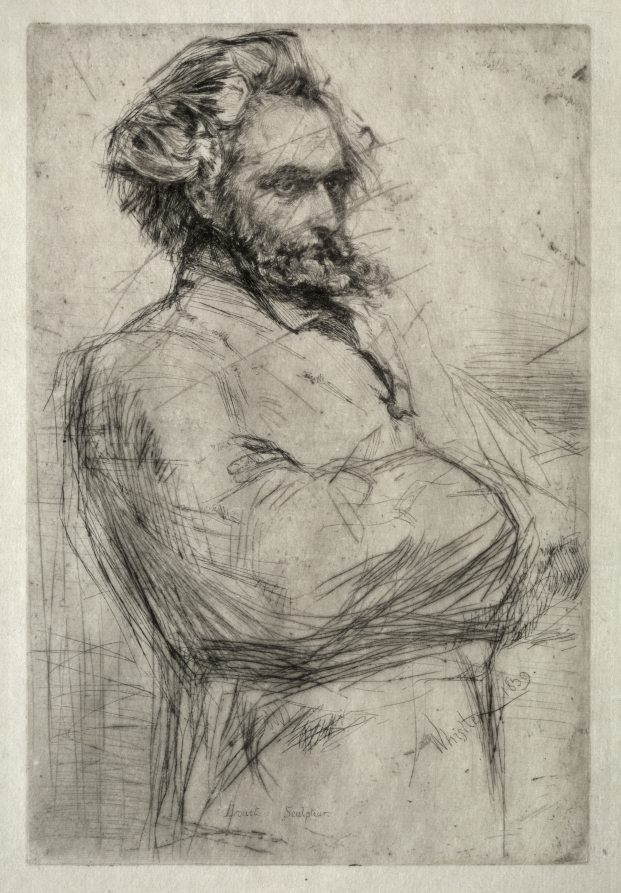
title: Drouet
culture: America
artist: James McNeill Whistler (American, 1834–1903)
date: 1859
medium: drypoint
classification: Print